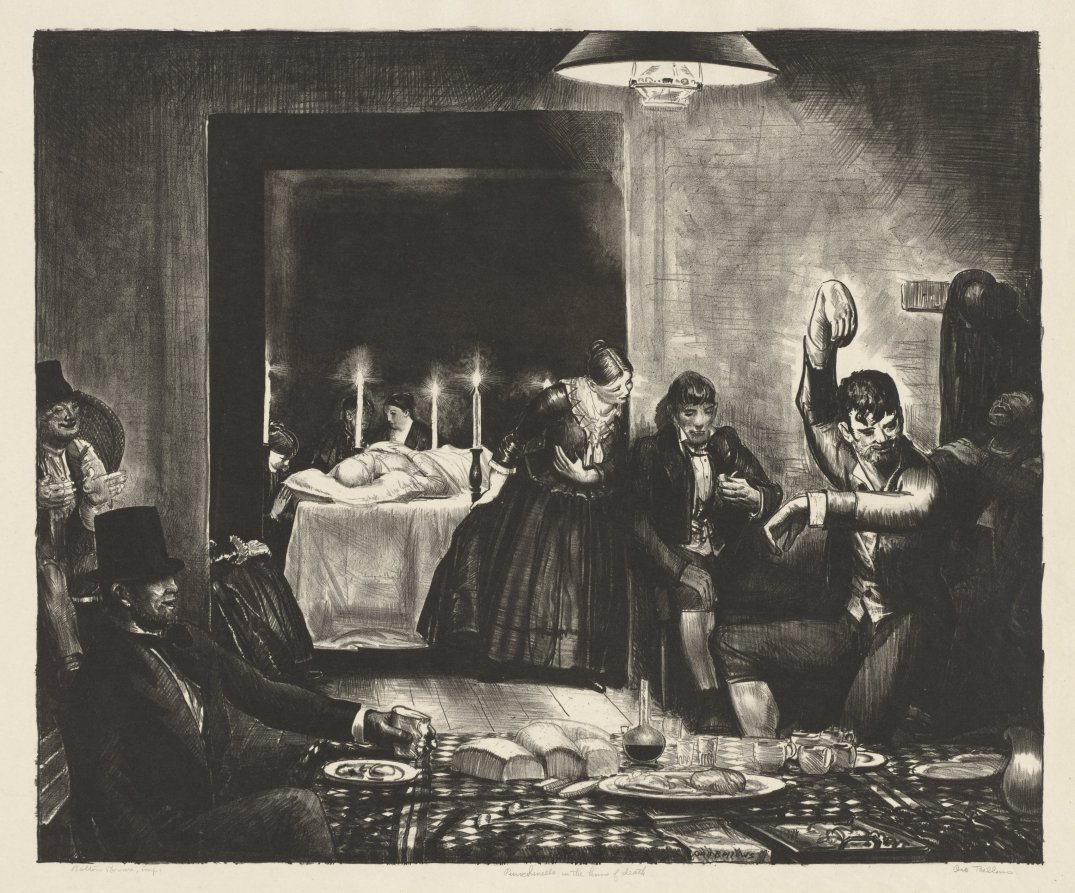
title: Punchinello in the House of Death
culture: America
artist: George Bellows (American, 1882–1925)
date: 1923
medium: lithograph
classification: Print